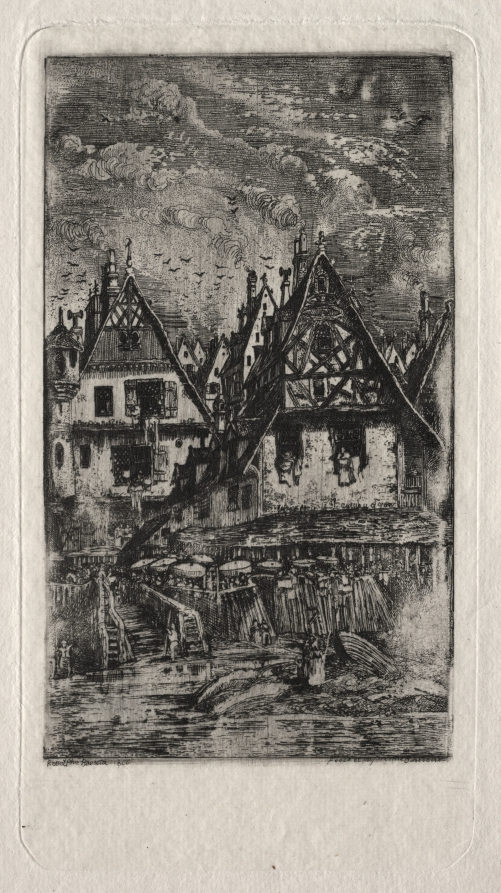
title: Marketplace with Parasols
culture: France, 19th century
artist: Rodolphe Bresdin (French, 1822–1885)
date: 1866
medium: etching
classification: Print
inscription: lower left, in plate: Rodolphe Bresdin 1866; lower right, in plate: fecit et imprinne Bordeaux; center right: forte (?) fecit Caillou aqua